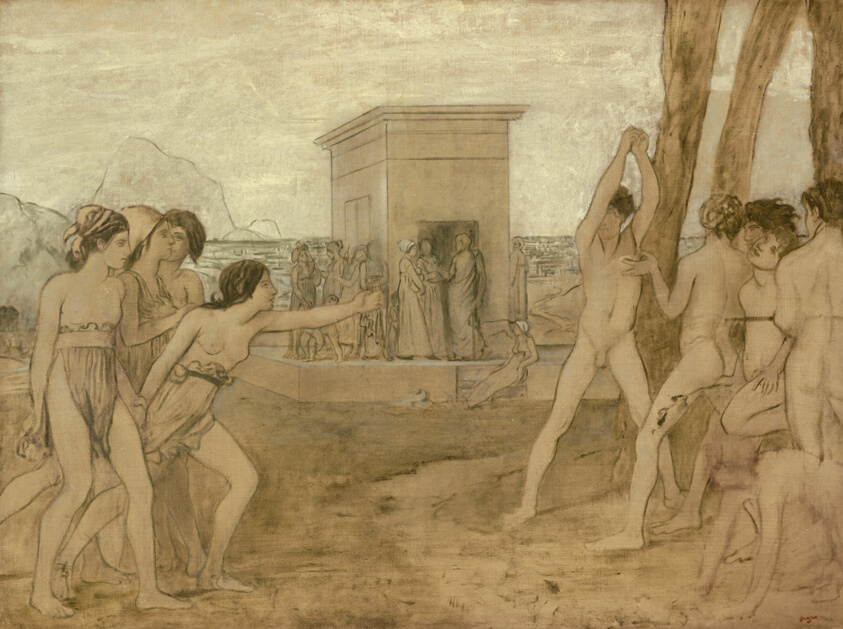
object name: Painting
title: Young Spartan Girls Challenging Boys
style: Impressionism, 19th century, nineteenth century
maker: Edgar Degas (French, 1834–1917)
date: c. 1860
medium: Oil on canvas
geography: France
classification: painting; oil paintings (visual works); france; french; oil on canvas; paint; european painting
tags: youth, architecture, boys, children, figures, France, French, girl, girls, Greece, Greek, landscape, men, nudes, sketch, trees, women